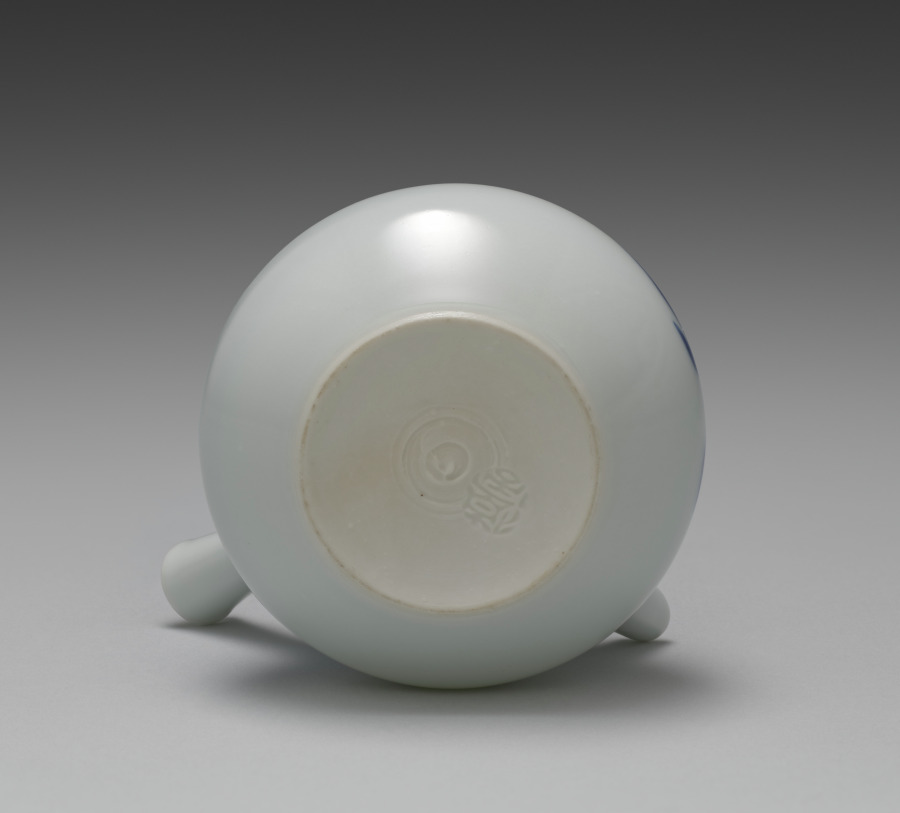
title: Teapot with Cherry Blossoms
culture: Japan, Taishō period (1912–26) or Shōwa period (1926–89)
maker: Seifū Yohei IV (Japanese, 1872–1951)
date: 1914–46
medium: Porcelain with underglaze blue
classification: Ceramic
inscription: 清風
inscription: 清風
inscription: 清風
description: This teapot with mountain cherry blossom motifs has its design in underglaze cobalt blue. It runs over both the pear-shaped body and the recessed lid, with its pointed, jewel-shaped handle. There is a faint bluish-green tint to the glaze. The mark impressed into the base of this work appears to be one used by Yohei III. However, the box inscription is brushed in a hand matching that of Yohei IV, and while the seal on the lid is one often used by Yohei III, that next to the signature on the back of the lid is one generally used by Yohei IV. The signature, too, resembles others belonging to Yohei IV. As the design, technique, and object named on the box accurately describe the contents, it seems unlikely, but not impossible, that it is mismatched. There are many cases in which Yohei III works are contained in boxes with inscriptions, seals, and a signature by Yohei IV. However, in such examples, Yohei IV clearly identifies himself as authenticating the work of his father and often includes his father’s Imperial Household Artist seal. This may be an example of a transitional piece in which Yohei IV has used his father’s mark on the base of his own work.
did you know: Cherry blossoms mark the arrival of spring, and their short-lived beauty is deeply anticipated and appreciated.